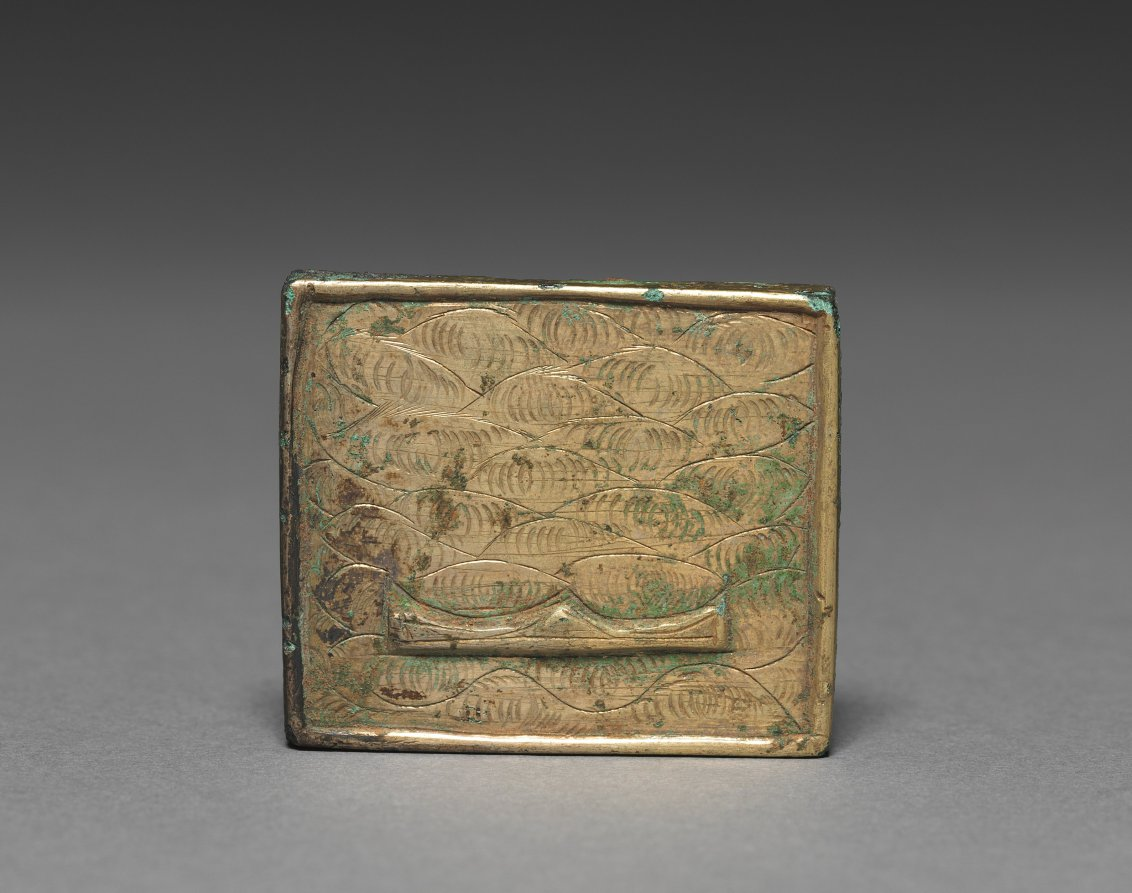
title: Belt Ornament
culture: Korea, Goryeo dynasty (918–1392)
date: 918–1392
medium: bronze gilt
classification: Metalwork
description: Metallurgy advanced remarkably in the Goryeo period (918-1392), explaining why a large quantity of sophisticated metal artifacts with delicate designs were used not only as daily accessories but also as burial goods. Belt ornaments like this example were fixed to leather belts.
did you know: The Japanese antique dealer Yamanaka & Company, which opened its branches in New York (1895) and Boston (1899) sold small Korean archaeological materials such as this belt ornament to American collectors in the early 20th century.